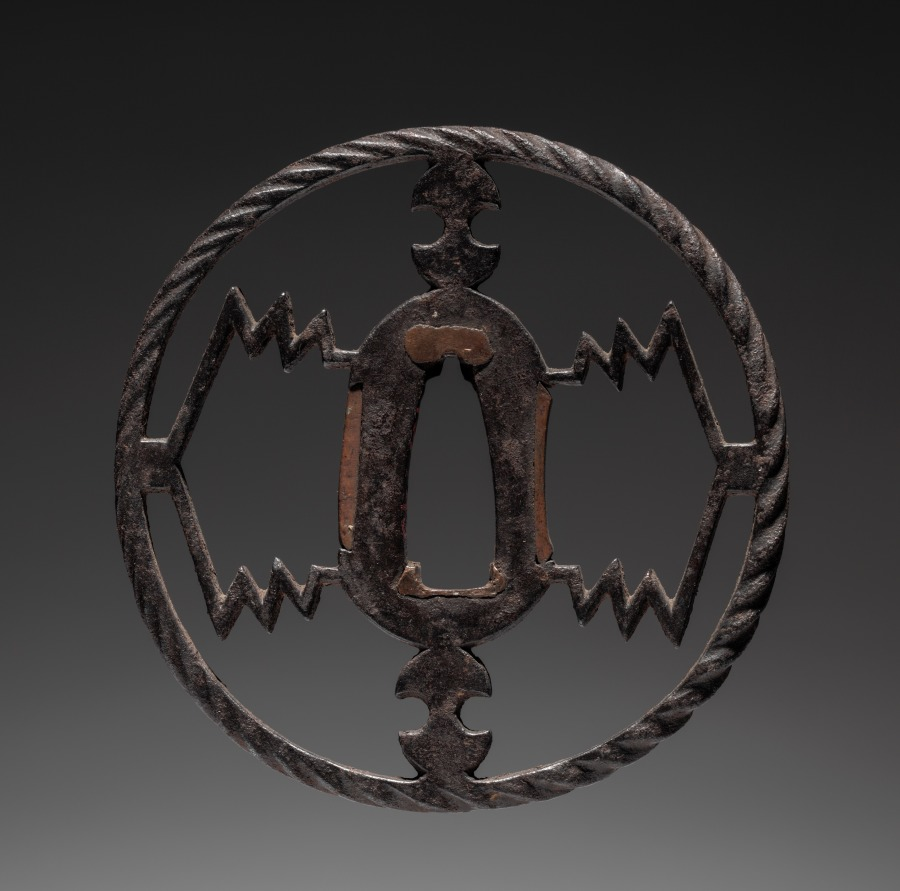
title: Sword Guard (Tsuba)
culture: Japan, possibly Edo period (1615-1868)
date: c. 1615–1868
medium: iron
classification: Arms and Armor